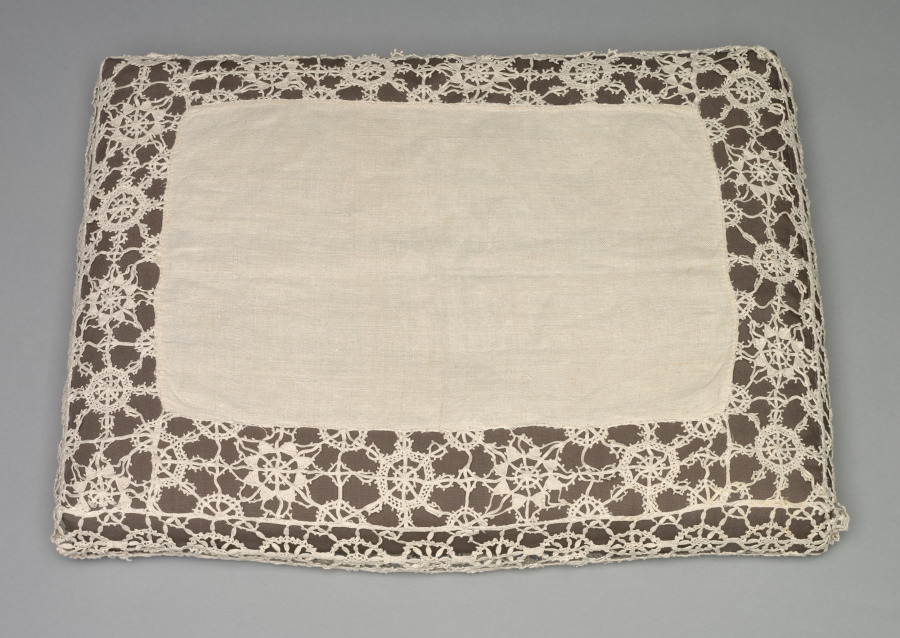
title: Lace Pillow Cover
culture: Italy, Genoa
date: 1600s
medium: Linen: needle lace (reticella) and bobbin lace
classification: Lace